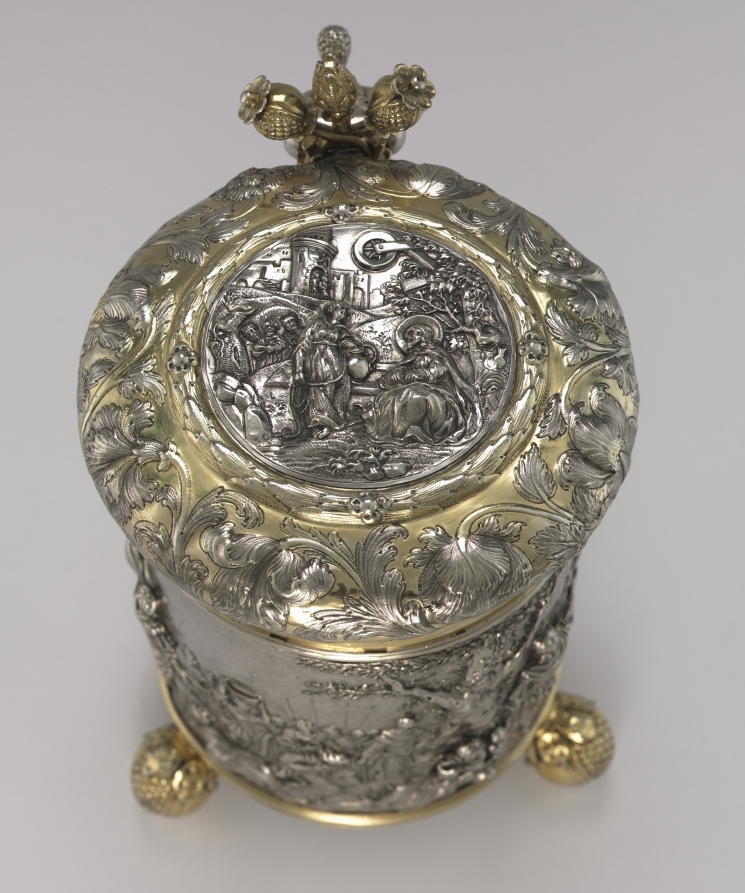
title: Tankard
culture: Germany, Augsburg, 17th century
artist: Andreas Brachfeldt (Russian, born Latvia, active 1661–1697)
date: c. 1680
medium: cut and seamed silver sheet, repoussé and chased ornament, cast handle and feet, partially gilded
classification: Metalwork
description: Tankards of this form were made toward the end of the 1600s in various port cities rimming the Baltic Sea. This example is enriched with a detailed scene of Moses striking the rock, executed in Augsburg, Germany, in about 1675–78.